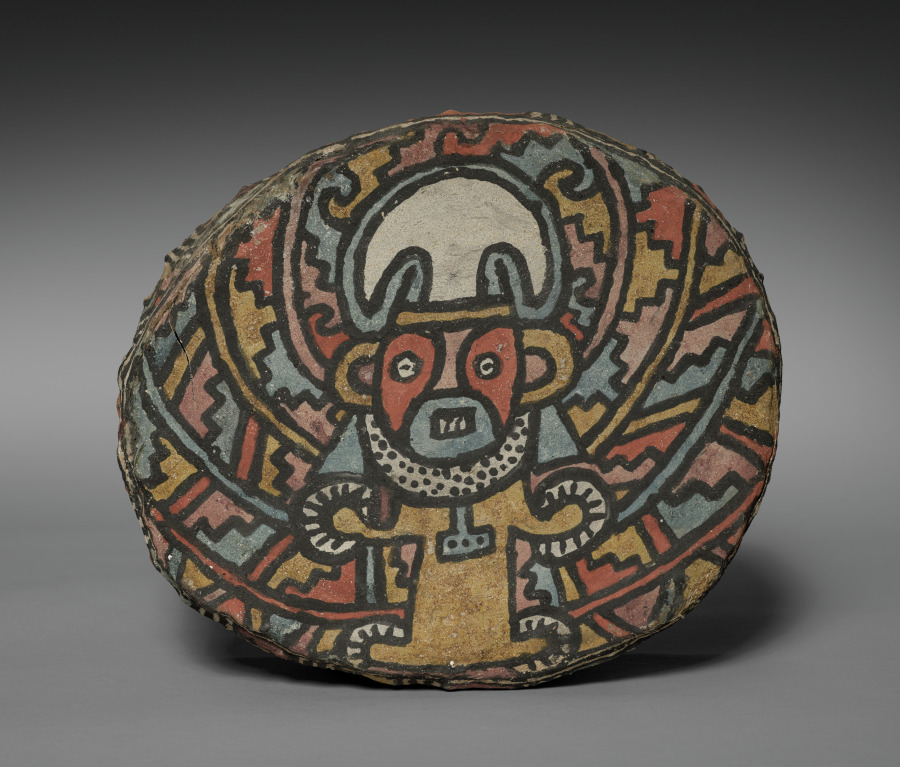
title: Painted Drum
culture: Central Andes, Middle Horizon, North Coast?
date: 500–1000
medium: Animal hide, gesso, wooden slats, pigment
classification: Musical Instrument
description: In the 1600s, music was so important to Indigenous Andean ceremonial life that Spaniards destroyed thousands of musical instruments to hasten Natives’ conversion to Christianity. The number of surviving, older instruments suggests that music had similar import in earlier periods. This rare example is painted with a figure wearing a crescent headdress, an emblem of status; it may have been played by a woman.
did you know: This painted drum may have been played by a woman in antiquity.